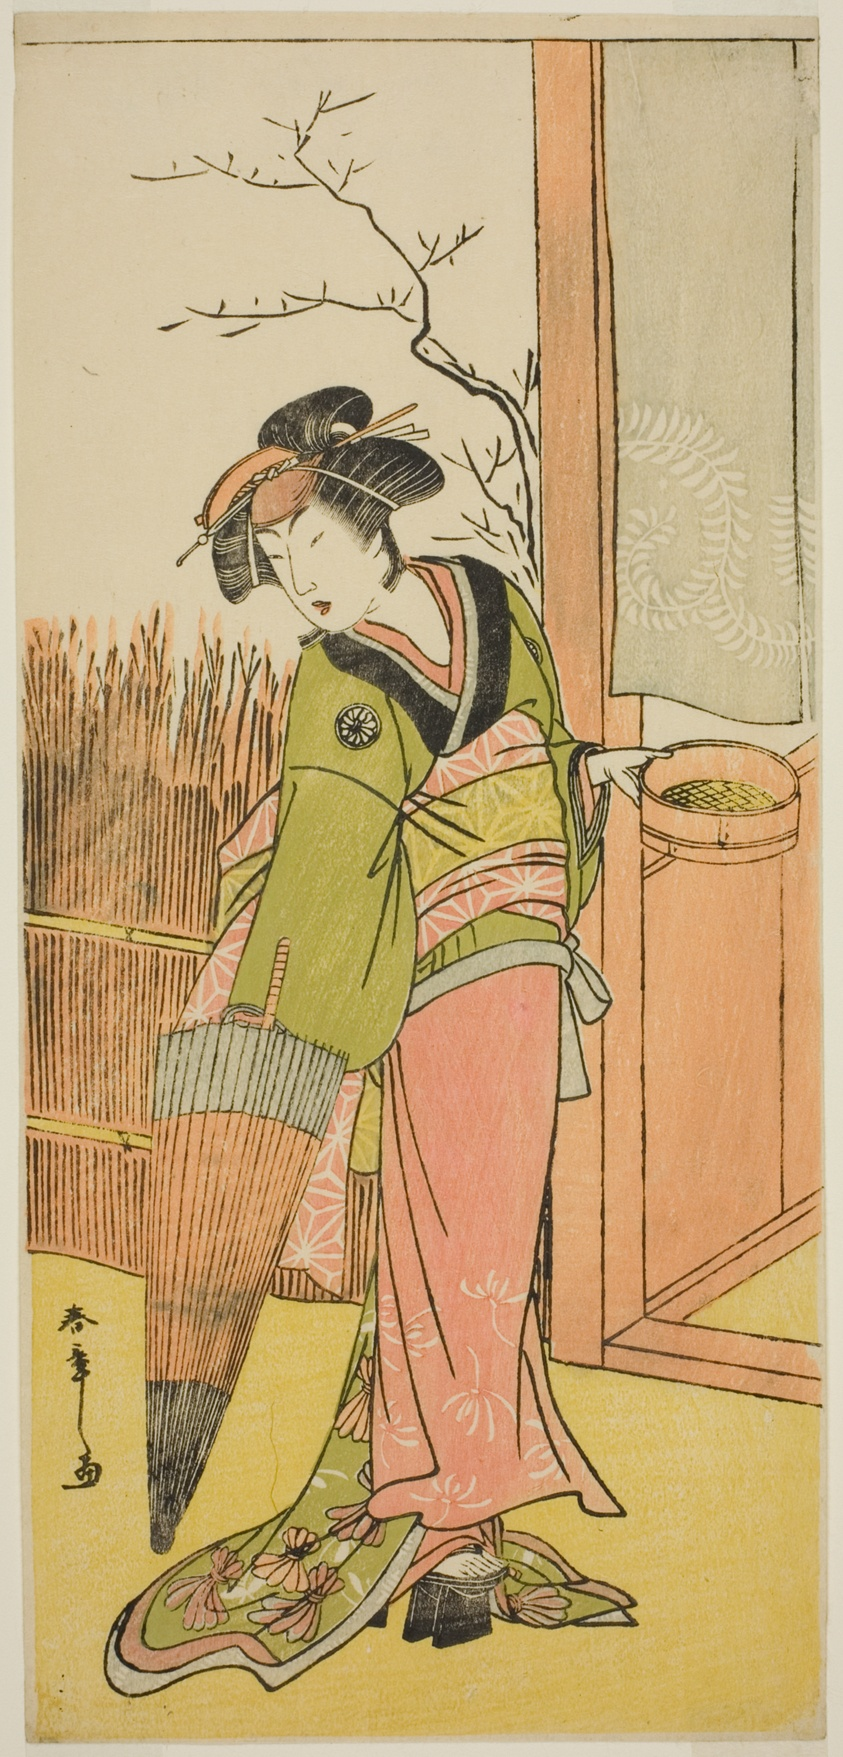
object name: Print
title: The Actor Segawa Kikunojo III in an Unidentified Role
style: Japanese (culture or style)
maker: Katsukawa Shunsho 勝川 春章; Japanese, 1726-1792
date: c. 1776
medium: Color woodblock print; hosoban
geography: Japan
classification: woodblock print; print; asian art